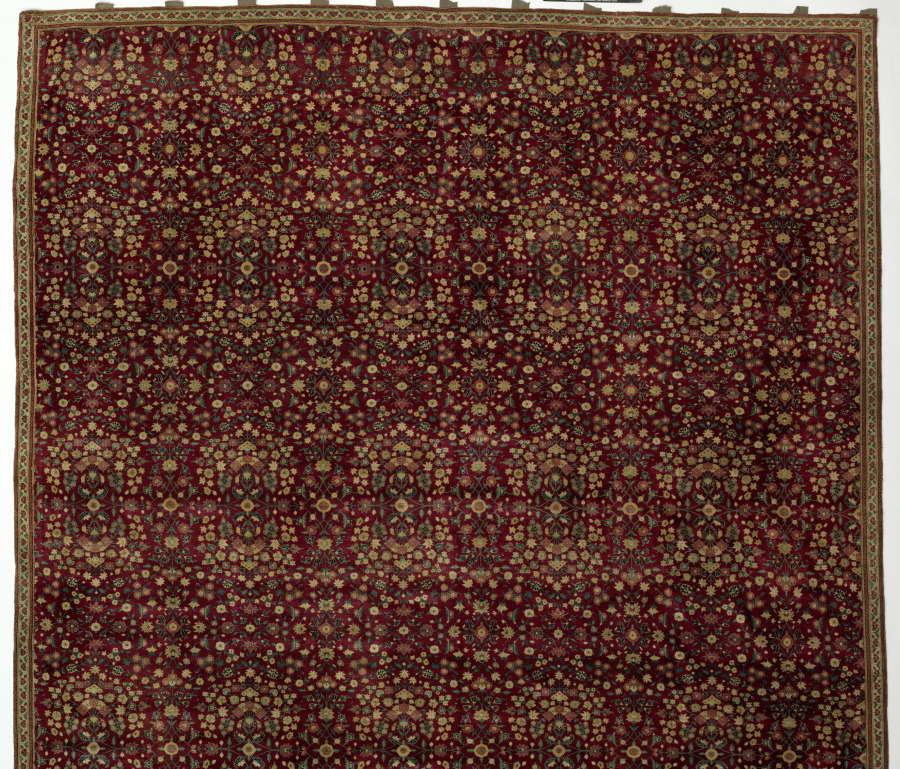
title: Woolen carpet with millefleurs decoration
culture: India, Kashmir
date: early 1600s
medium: Pashmina (wool): asymmetrical knot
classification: Carpet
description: Pashmina, a very fine fiber made from the fleece of Himalayan goats, was a material highly valued at the Mughal courts. Luxury rugs functioned in several ways, including as insulators for palatial and ceremonial spaces and as framing devices for important figures. In a biography of the Mughal emperor Akbar (reigned 1556–1605), called the Ain-i-Akbari, the court historian Abu’l Fazl (1551–1602) poetically wrote that such textiles created “a beautiful flowerbed.” The description is apt, as this carpet features an impressively symmetrical floral design known as millefleurs, or “thousand flowers” in French. Viewing several of these carpets and other hangings at once would have been visually impressive for court attendees.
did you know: The border contrasts with the central design, putting red flowers against a white background.